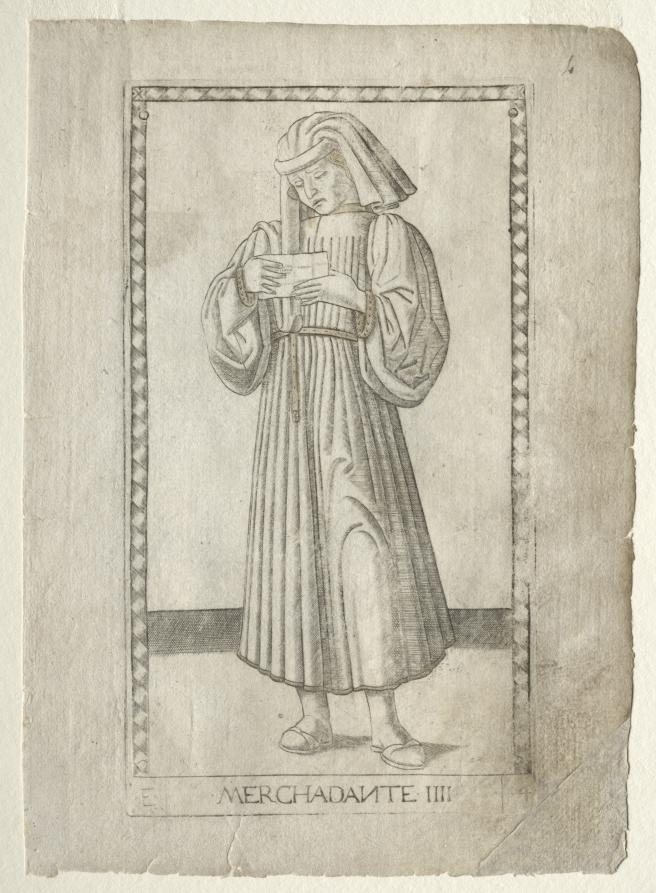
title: The Merchant (from the Tarocchi, series E: Conditions of Man, #4)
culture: Italy, Ferrara, 15th century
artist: Master of the E-Series Tarocchi (Italian, active 1460s)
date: before 1467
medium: engraving hand-colored with gold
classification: Print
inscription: Lettered below the image of Merchadante (The Mercant): ·E· / ·MERCHADANTE· IIII· / ·4·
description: This engraving is part of the Tarocchi group marked with the letter “E,” and named Conditions of Man. This series outlines the social and hierarchical order of ten characters (Beggar, Servant, Artisan, Merchant, Gentleman, Knight, Doge King, Emperor, and Pope), starting from the lower grade and ending with the most important one. Here, Merchadante (The Merchant) is shown as a full-length male figure, turned to the left. He reads a piece of paper that he is holding in his hands.